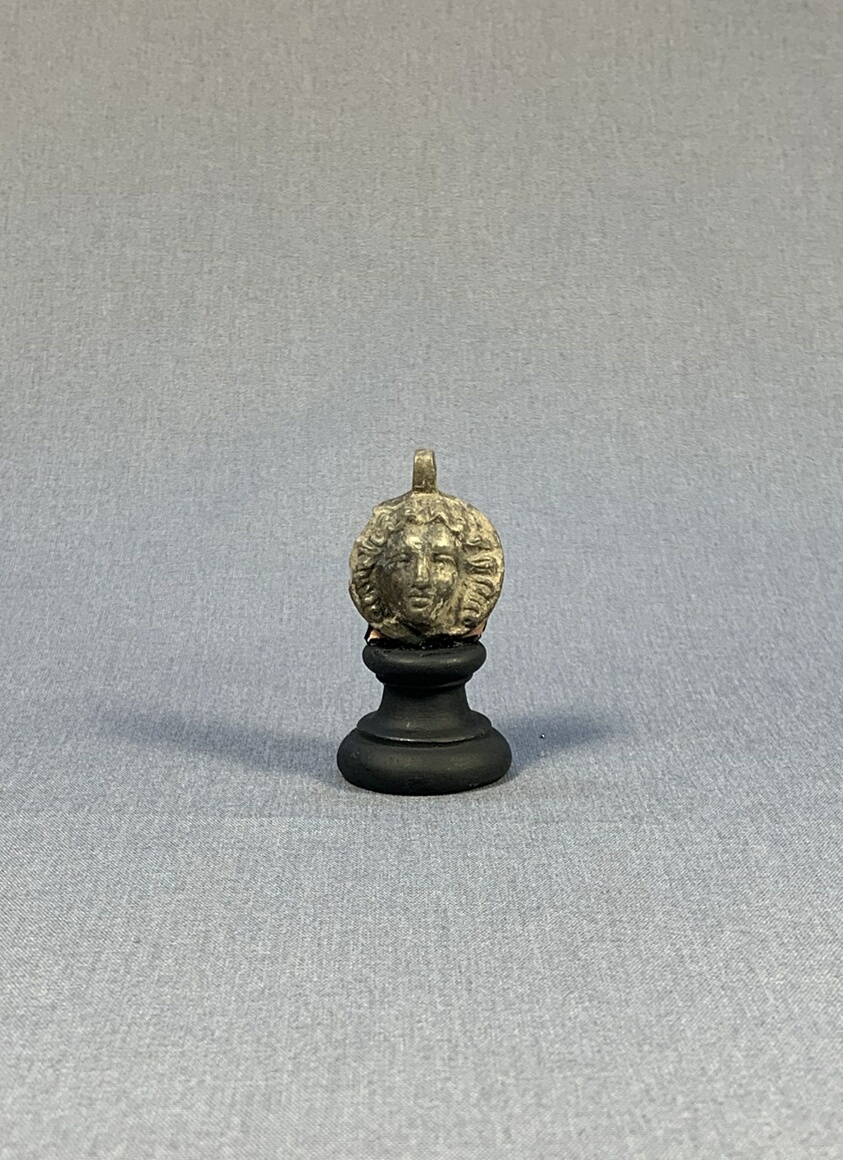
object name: Sculpture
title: Pendant Depicting Apollo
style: greek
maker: Greek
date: 2nd-1st century BCE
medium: terracotta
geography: Greece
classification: earthenware; ceramics; sculpture; ancient art